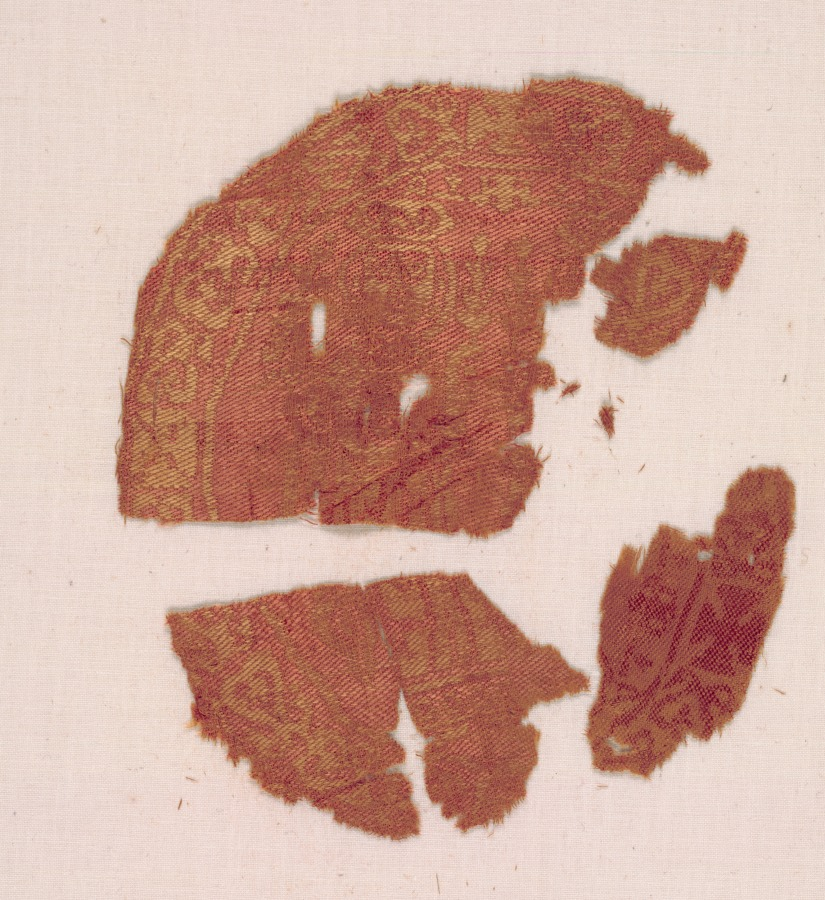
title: Fragments of Two Circular Segmenta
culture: Syria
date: 600s–700s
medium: compound twill weave, silk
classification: Textile